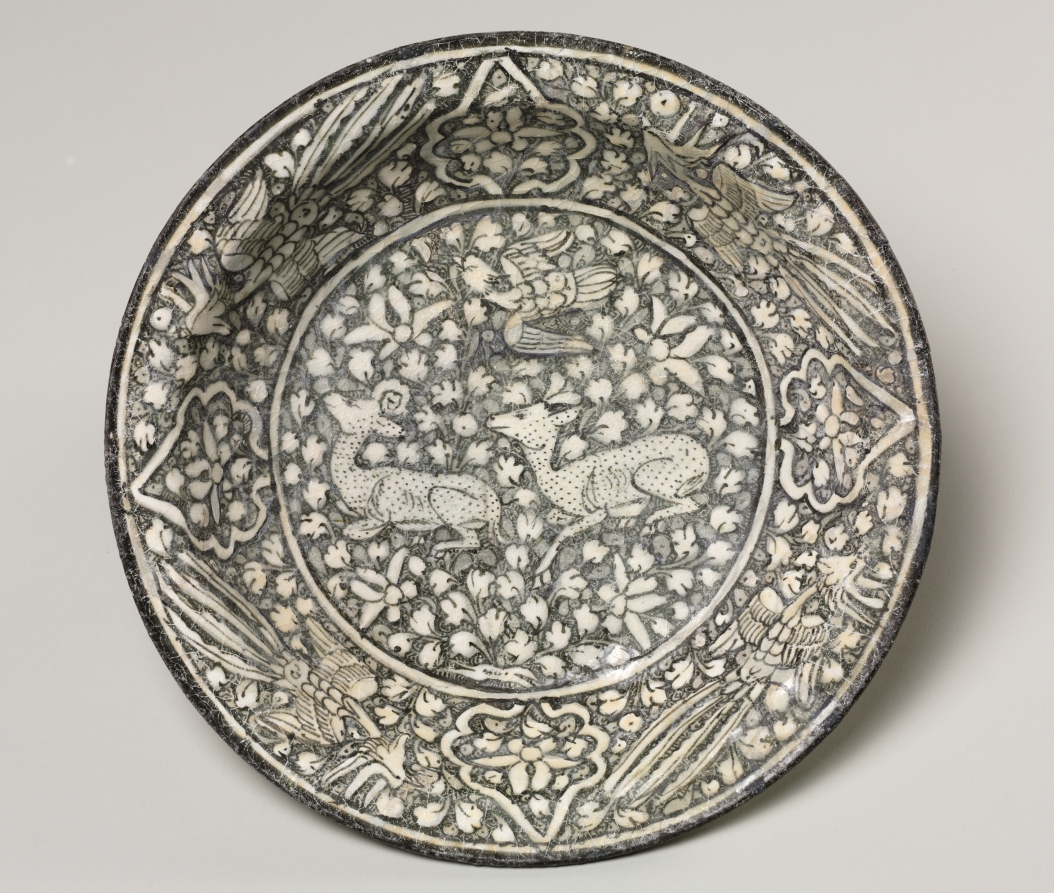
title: Ceramic dish with deer, phoenix, and lotus blossoms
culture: Iran, probably Sultanabad, Ilkhanid period (1256–1353)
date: 1300–1350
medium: Fritware with underglaze-painted design, Sultanabad ware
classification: Ceramic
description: The design of a flying phoenix on the rim was frequently represented on vessels and tilework of this period. The motif was derived from China, most likely transmitted on prestigious silk textiles.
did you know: Fritware is made of ground quartz, glass frit (partially fused glass), and a small proportion of fine white clay to approximate the light color and weight of Chinese porcelain.